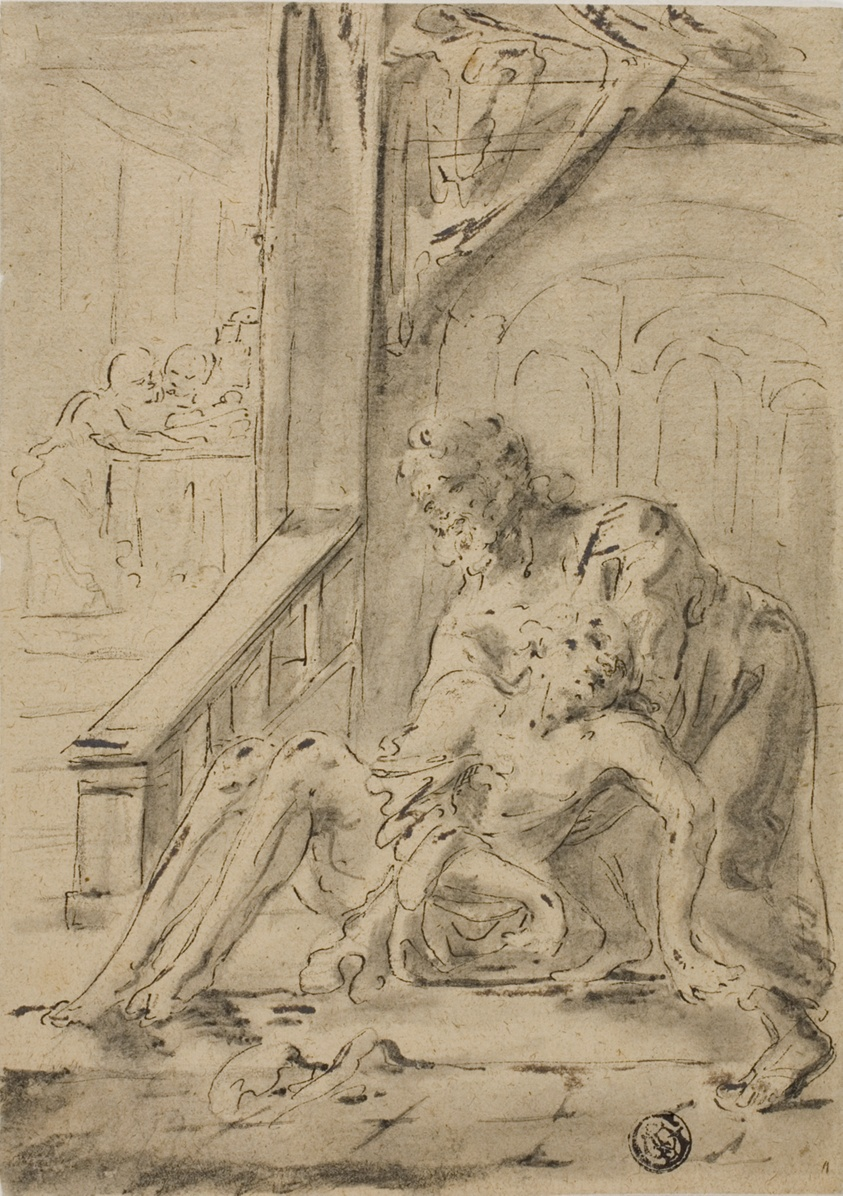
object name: Drawing and Watercolor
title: Old Man Supporting Young Man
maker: Unknown Artist; Dutch, 17th century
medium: Pen and black ink, with brush and gray wash, heightened with lead white (discolored) over black chalk, on tan laid paper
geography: Netherlands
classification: pen and ink drawings; drawings (visual works); prints and drawing